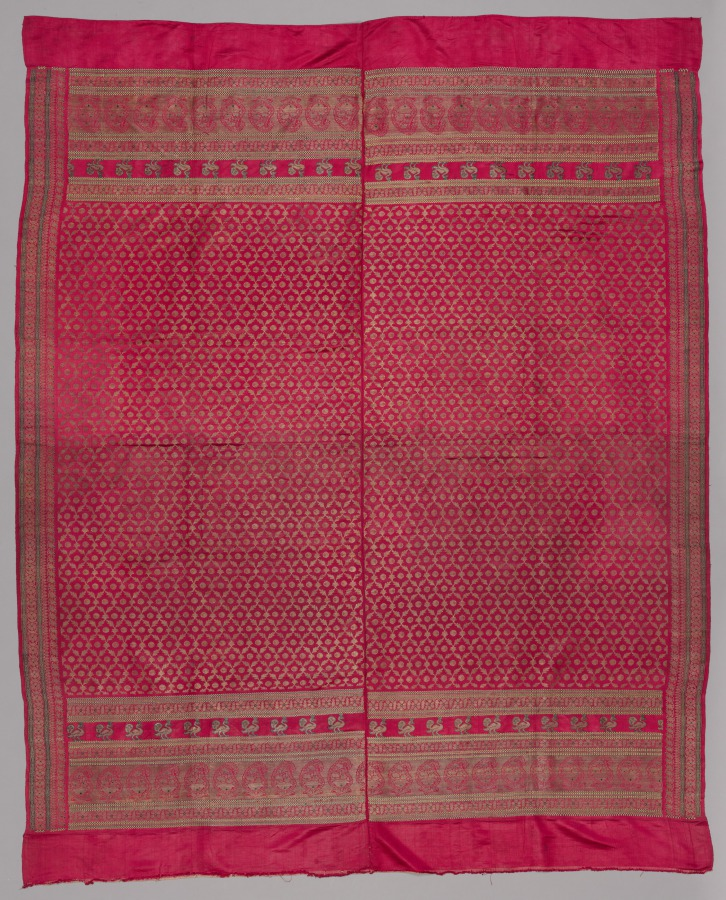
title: Gold Brocade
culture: India, 19th century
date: 1800s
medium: brocade; silk and metal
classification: Textile